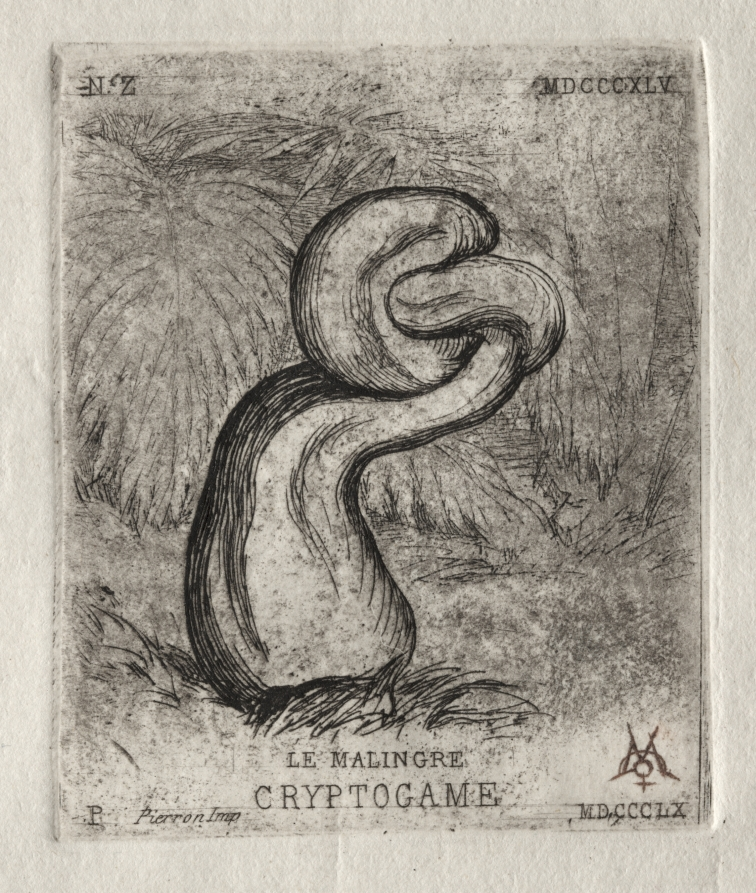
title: The Sickly Cryptogam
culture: France, 19th century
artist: Charles Meryon (French, 1821–1868)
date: 1860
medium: etching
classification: Print